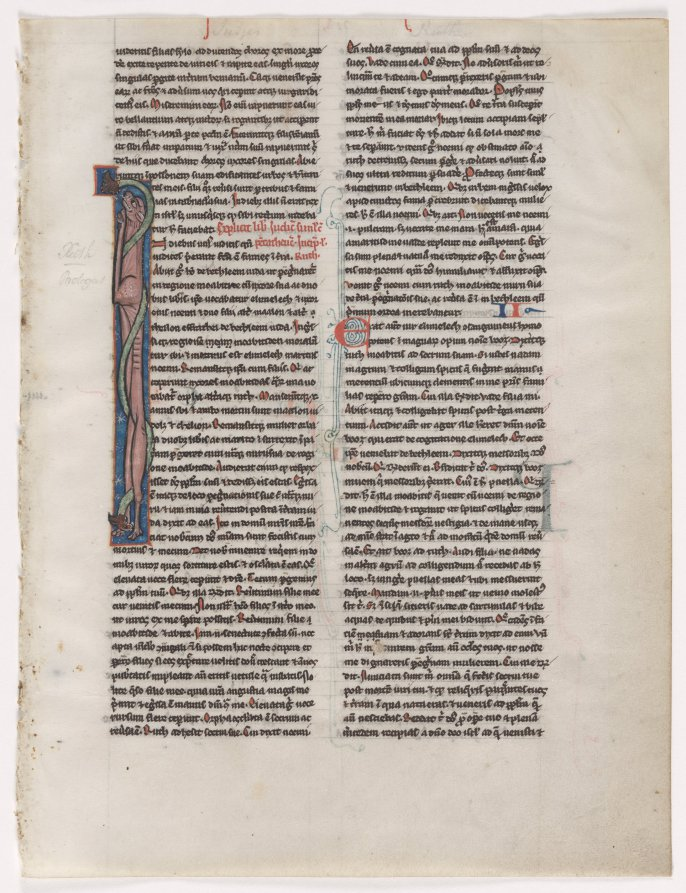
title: Initial I: Entwined Beast and Serpent: Leaf from a Bible (2 of 2 Excised Leaves)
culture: England, Glastonbury?, 13th century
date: c. 1225–1250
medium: tempera and ink on vellum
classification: Manuscript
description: Pair of Leaves from a Latin Bible: Initial I: Entwined Beast and Serpent (opening of Book of Ruth) and Initial E: Entwined Lion and Serpents (opening of the Third Book of Kings), about 1225-50 England, Glastonbury(?) Ink and tempera on vellum The Jeanne Miles Blackburn Collection [Cat. nos. 2 and 3 (CMA 1999.122)] This pair of leaves from the same one-volume Bible have been traditionally associated with the Benedictine abbey of Glastonbury in southwest England. It is known that the Bible once belonged to the English antiquary and collector, Roger Gale (1672-1744), whose library of 450 manuscripts once included two of the surviving 35 books from Glastonbury Abbey. Until its dissolution in 1539, Glastonbury was one of the greatest and wealthiest abbeys in Europe. Given its vast wealth and the recorded library lists, the abbey must have been a substantial patron of the arts. However, only a few illuminated manuscripts can now be positively identified as Glastonbury work.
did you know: The museum owns another leaf from this same bible, 1999.122.